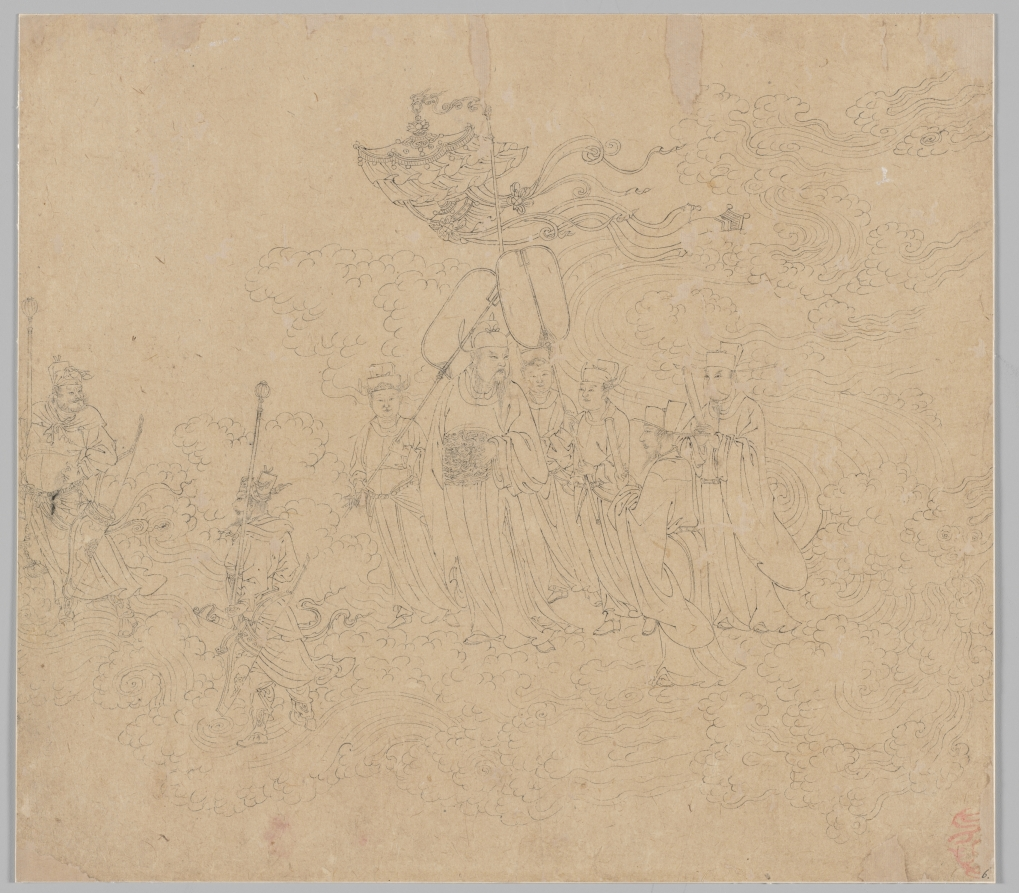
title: Album of Daoist and Buddhist Themes: Procession of Daoist Deities: Leaf 6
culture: China, Southern Song dynasty (1127-1279)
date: 1200s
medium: Album, ink on paper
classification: Painting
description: This extraordinary album has 50 paintings on a variety of religious subjects. They were likely created by several master craftsmen to share with studio apprentices as models for fulfilling commissions. The Jade Emperor and the Daoist pantheon make up the first 26 leaves. The next 14 leaves portray the Buddhist Ten Kings of Hell administering punishments to the dead. The third section, called “Clearing the Mountains,” features divine soldiers, led presumably by the deity Erlang Shen 二郎神, fighting undesirable creatures.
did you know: Six attendants escort a divine lord.